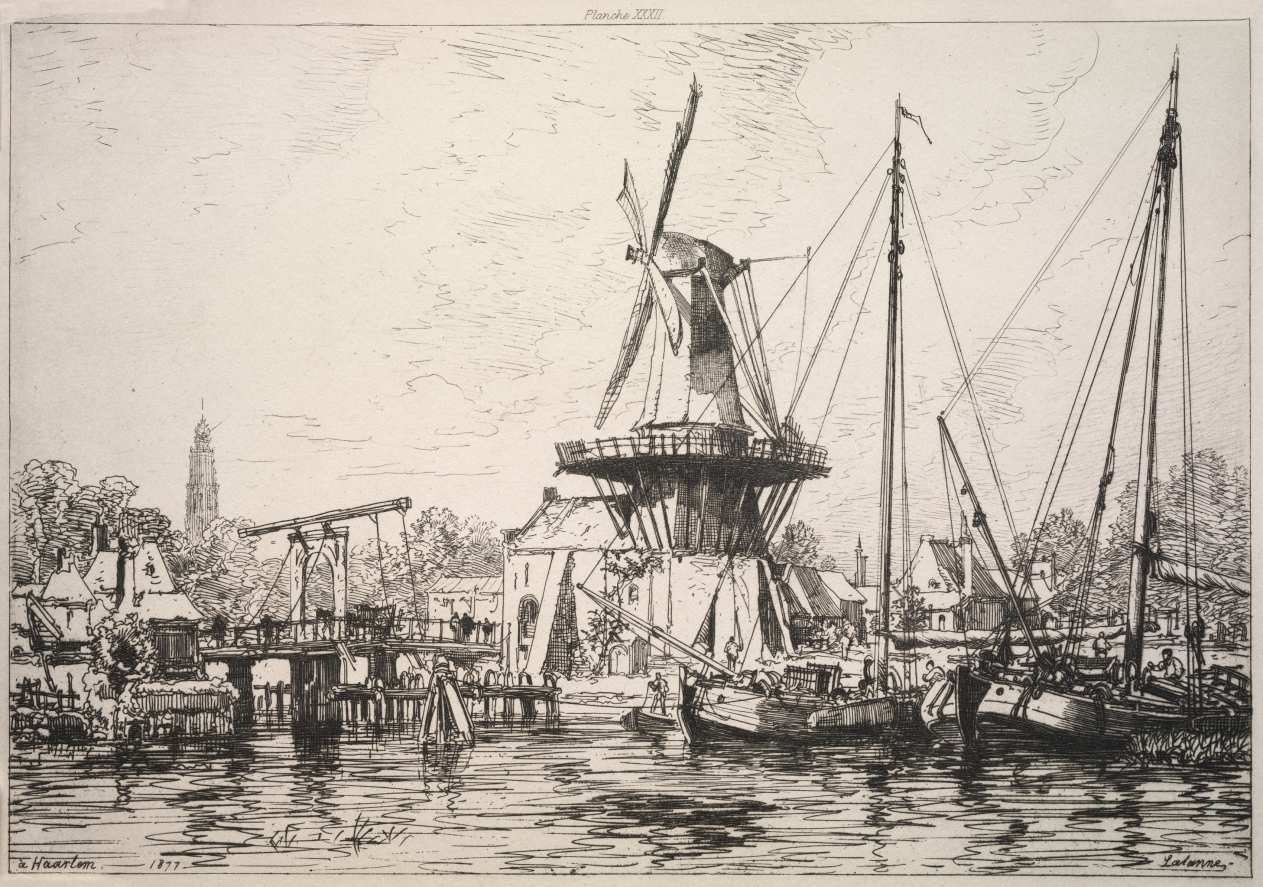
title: At Harlem (Holland)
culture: France, 19th century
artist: Maxime Lalanne (French, 1827–1886)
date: 1877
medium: etching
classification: Print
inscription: printed in plate, Planche XXXII